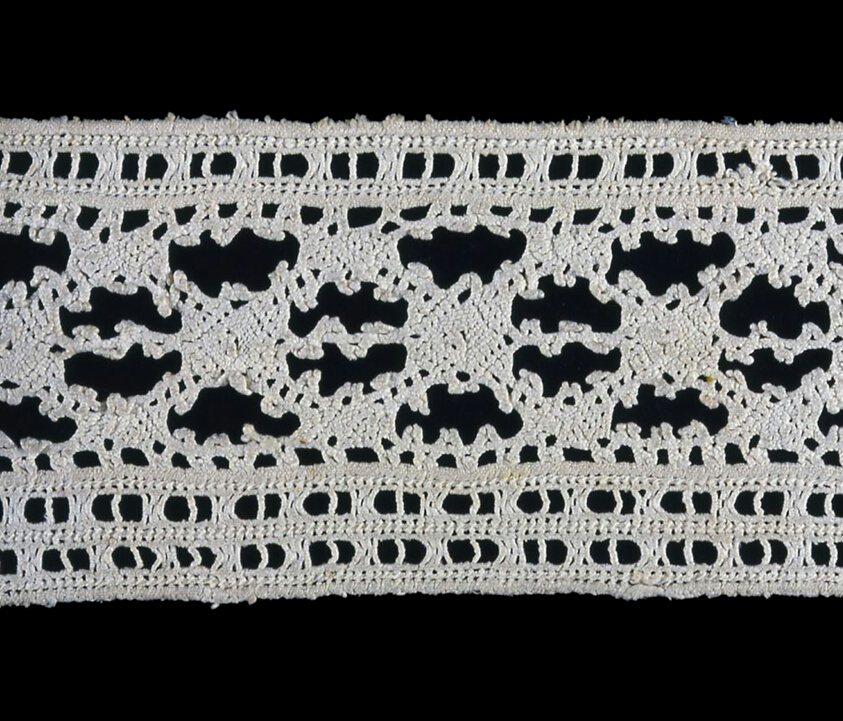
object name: Textile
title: Insertion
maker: Italy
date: 1550/1600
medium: Linen, plain weave; cut and drawn work embroidered in double and Italian hem stitches; darned and overcast bars; with insertion of bobbin straight lace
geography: Italy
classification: textile; needlework (visual works)